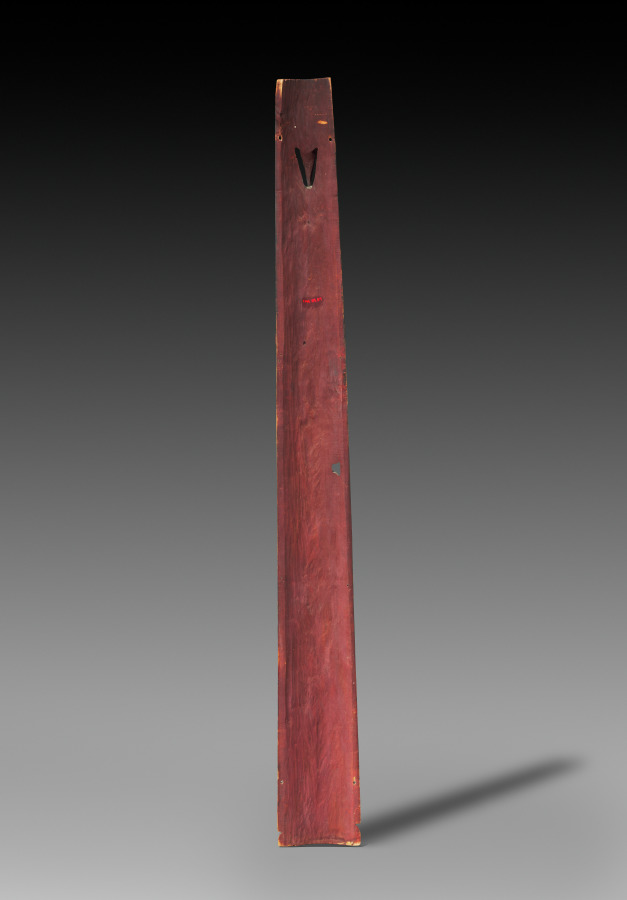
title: Totem Pole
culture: Northwest Coast, Tlingit, 19th century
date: c. 1880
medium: carved and painted wood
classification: Sculpture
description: Native American villages of the Pacific Northwest were marked by great totem poles that proclaimed the rank and ancestry of their owners. This small model pole was once owned by a Tlingit storyteller, a member of the coho salmon clan, of the raven tribe. Because the pole has been stored indoors, its carving and bright, original colors are undamaged by the elements. Reportedly, this totem pole illustrates several stories. Kushda-Kaw, the land-otter, is the pole's lowermost figure; above him is his wife. The wife transforms herself into an owl (the third figure from the bottom) and flies into the trees to keep watch. Kushda-Kaw then lies in wait to frighten and harass unwary passers-by. Above the owl is a finback whale carrying a friend out to sea for fishing. Near the top of the pole is a whale with red lips who has swallowed his enemy, the raven. The tiny figure at the pole's summit is a spirit-woman, the raven's lover. She will cut the whale open to rescue him.